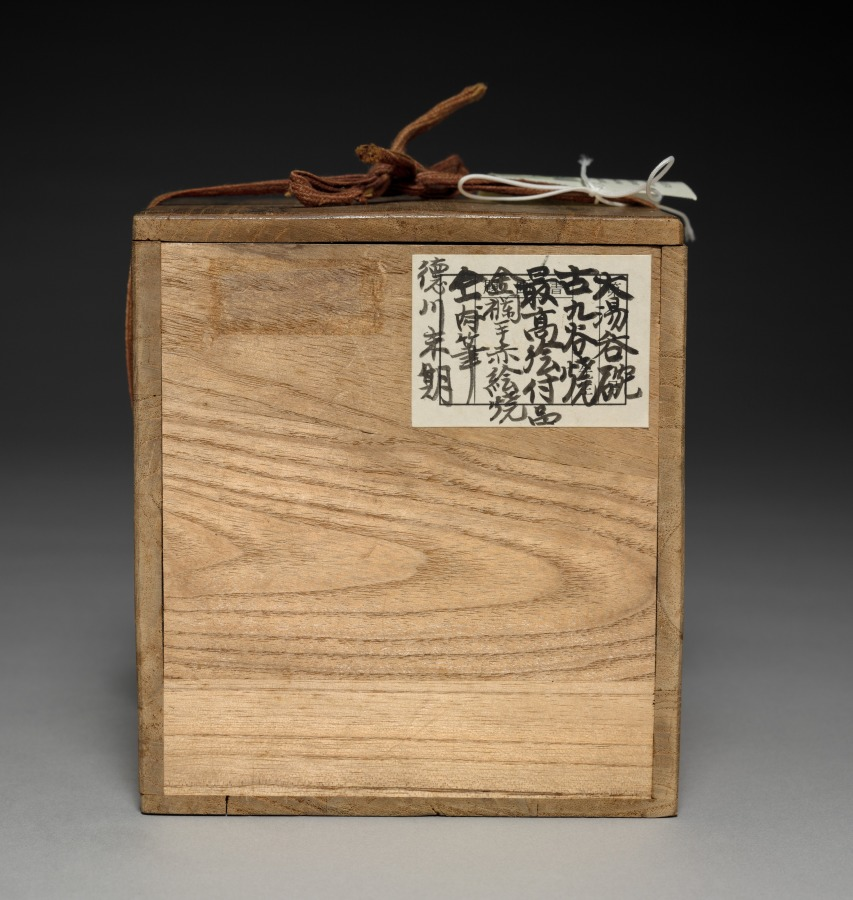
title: Cup with Plum and Rock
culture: Japan, Edo period (1615–1868)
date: 1700s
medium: porcelain with underglaze blue and overglaze enamel decoration (Hizen ware, Ko-Kutani type)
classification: Ceramic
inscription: 福